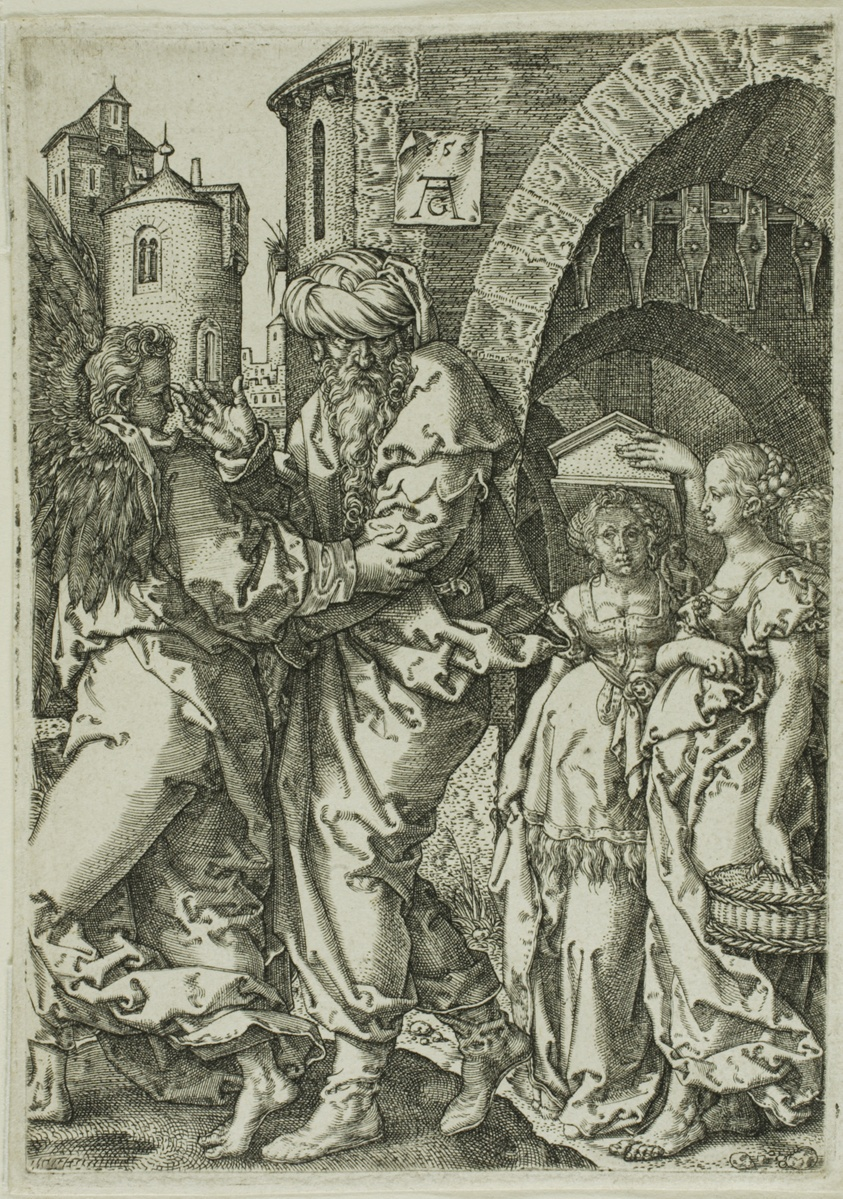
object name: Print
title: Lot and His Family Fleeing from Sodom, from The Story of Lot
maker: Heinrich Aldegrever (German, 1502-c.1560)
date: 1555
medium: Engraving in black on ivory laid paper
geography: Germany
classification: engraving; print; prints and drawing